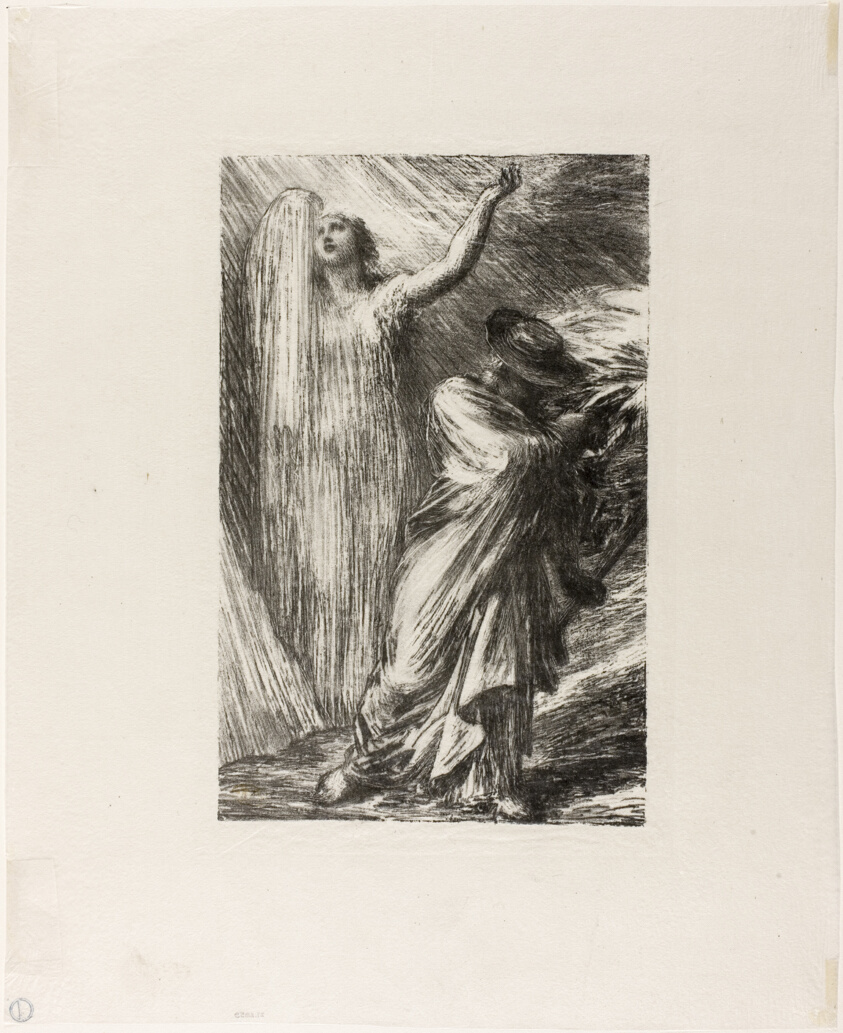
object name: Print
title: Siegfried: Act III, Evocation of Erda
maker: Henri Fantin-Latour (French, 1836-1904)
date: 1886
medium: Lithograph in black with scraping on stone on cream Japanese tissue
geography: France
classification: lithograph; print; prints and drawing